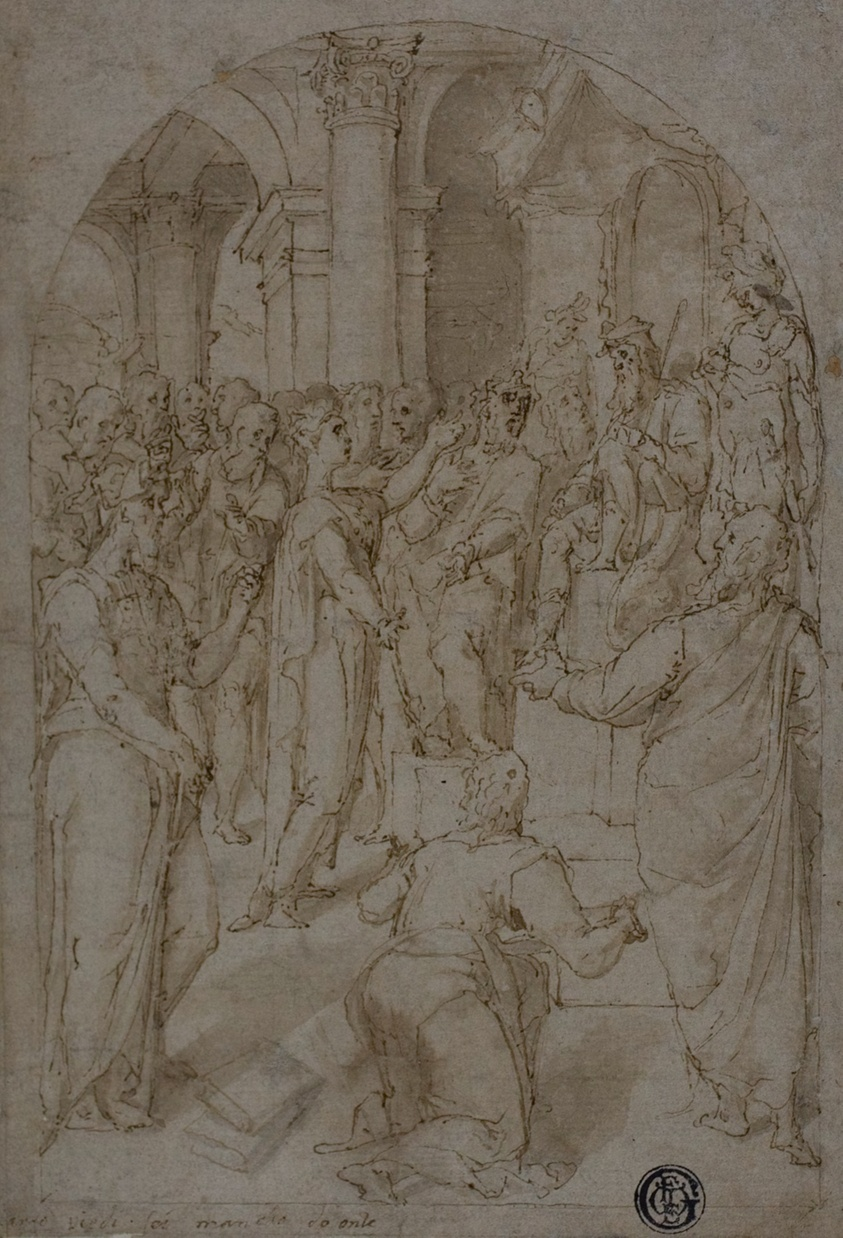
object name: Drawing and Watercolor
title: St. Catherine of Alexandria Disputing with the Doctors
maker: Unknown Artist; Italian, 1590-1599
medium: Pen and brown ink with brush and brown wash and gray wash, on tan laid paper, edge mounted on cream wove paper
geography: Italy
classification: ink with wash; drawings (visual works); prints and drawing